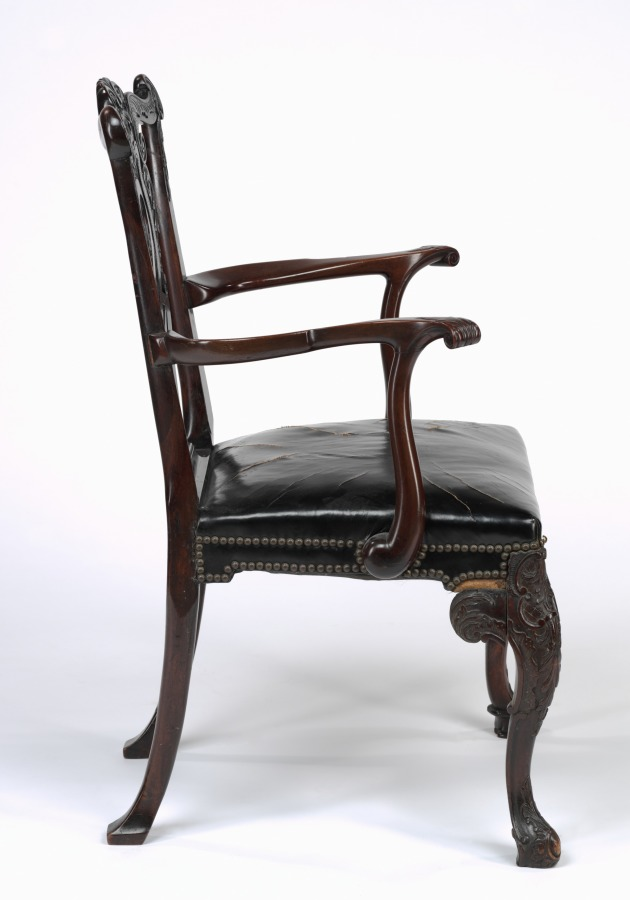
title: Armchair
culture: America, New York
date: c. 1875–80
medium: mahogany, leather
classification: Furniture and woodwork